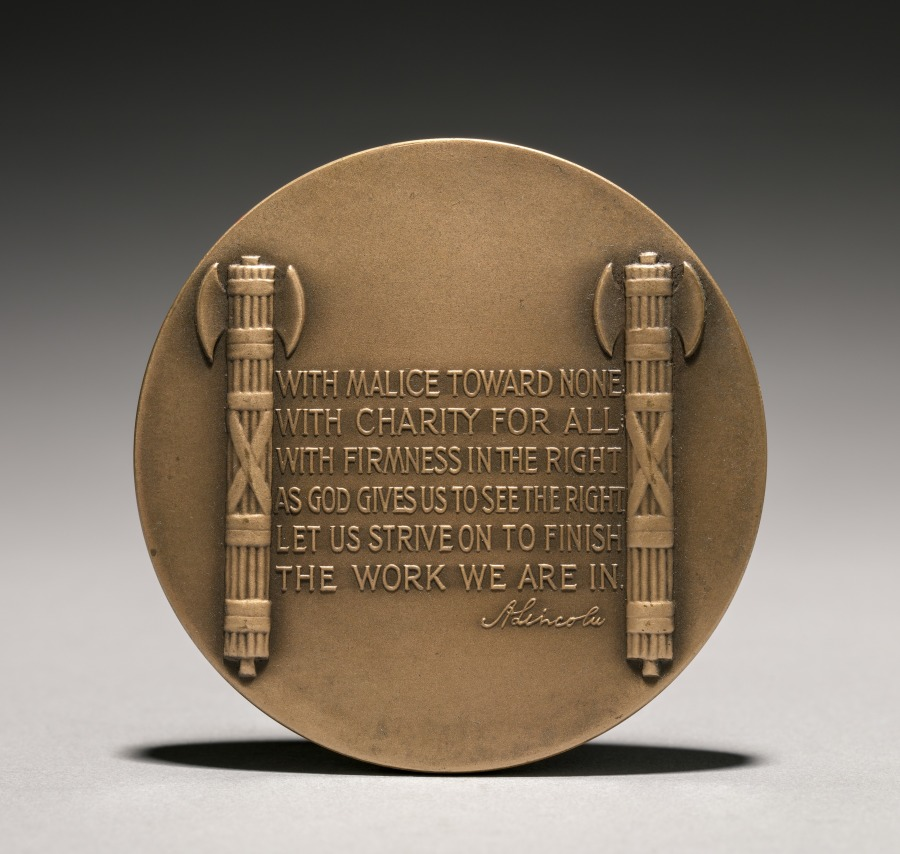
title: Abraham Lincoln Medal (reverse)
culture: America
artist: Charles Calverley (American, 1833–1914)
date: 1900s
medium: bronze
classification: Metalwork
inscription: "WITH MALICE TOWARD NONE/ WITH CHARITY FOR ALL/ WITH FIRMNESS IN THE RIGHT/ AS GOD GIVES US TO SEE THE RIGHT/ LET US STRIVE ON TO FINISH/ THE WORK WE ARE IN/ ALincoln [in ligature]."